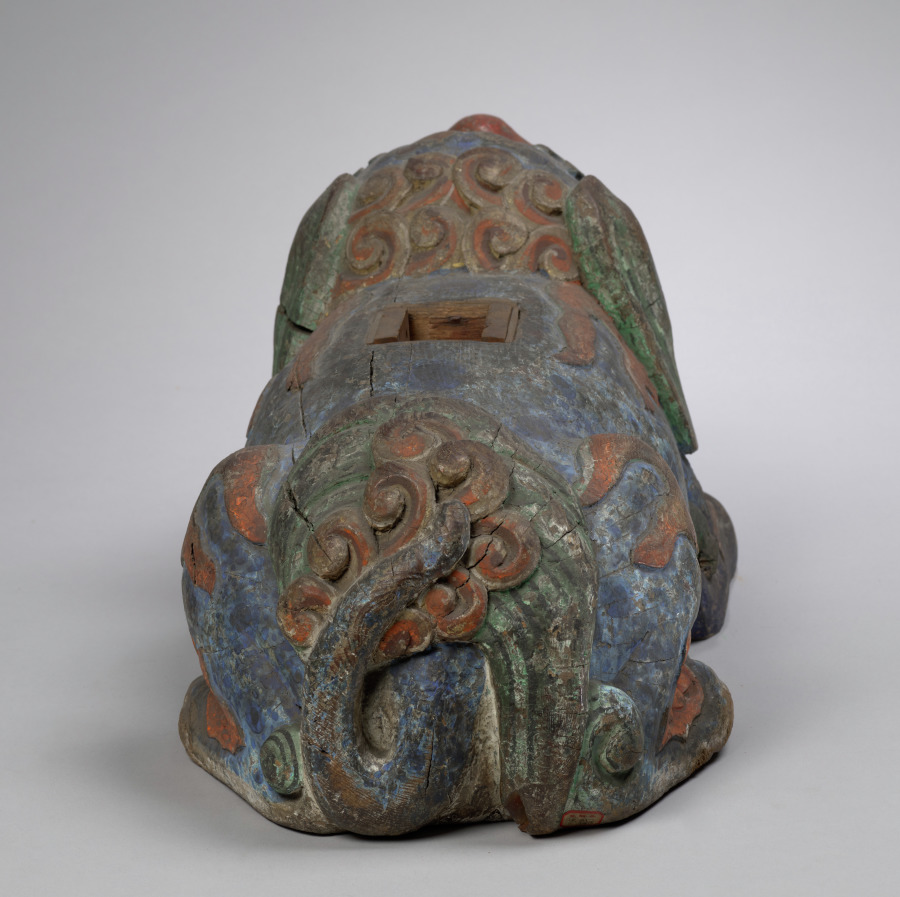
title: Base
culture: Korea, Joseon dynasty (1392–1910)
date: 1392–1897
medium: wood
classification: Arms and Armor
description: This wooden base for a musical instrument, possibly a set of bells or drums, was acquired in Korea in 1916 by Langdon Warner, who once served as the field agent for Asian art for the Cleveland Museum of Art. At the time of acquisition, it was mistaken as a part of a clothing stand related to a set of military uniform (1918.560.1) probably because the wooden base and a set of military uniform were purchased at the same antique shop.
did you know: It was a base of a musical instrument, such as a set of bells or drums.